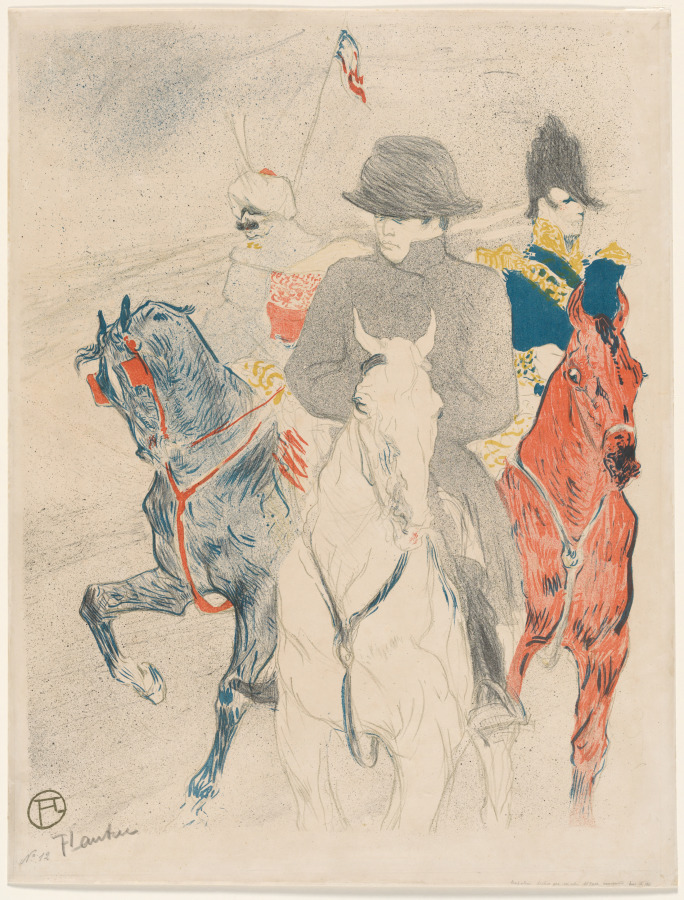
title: Napoleon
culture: France, 19th century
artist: Henri de Toulouse-Lautrec (French, 1864–1901)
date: 1895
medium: lithograph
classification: Print